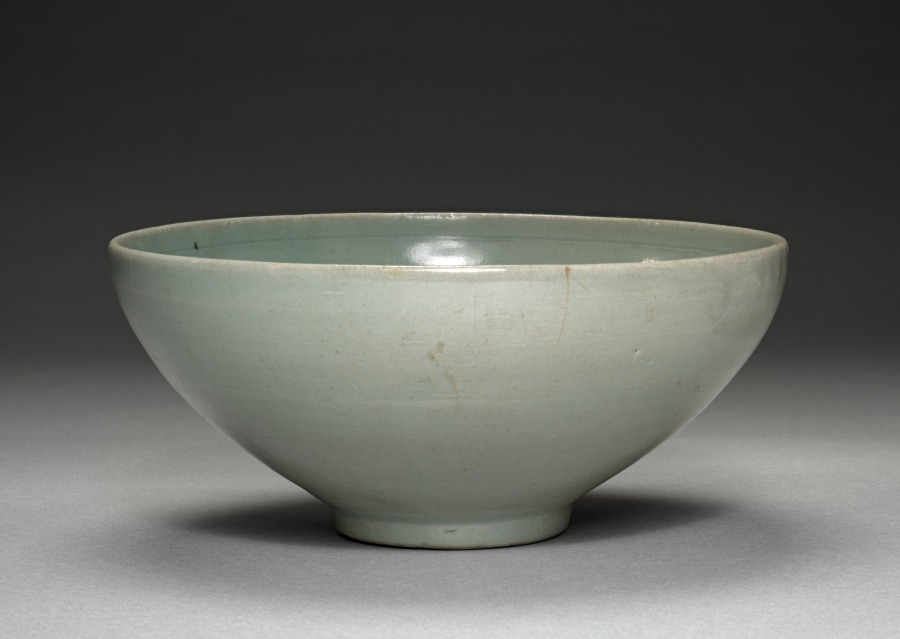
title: Bowl with Incised Parrot Design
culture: Korea, Goryeo dynasty (918–1392)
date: 1100s-1200s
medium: glazed porcelain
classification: Ceramic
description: As early as the 600s, the practice of drinking tea and wine became an important part of elite leisure culture in Korea. A wide bowl like this example was especially suitable for drinking powdered tea shaved from a compressed tea cake, the most commonly enjoyed type during the Goryeo period. The image of flying parrots inscribed on the inner wall of this tea bowl may have made the moment of drinking tea much enjoyable.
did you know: On the base of this tea bowl, three small spur marks made of bits of clay remain visible, indicating an individual protective casing of fire clay (saggar).